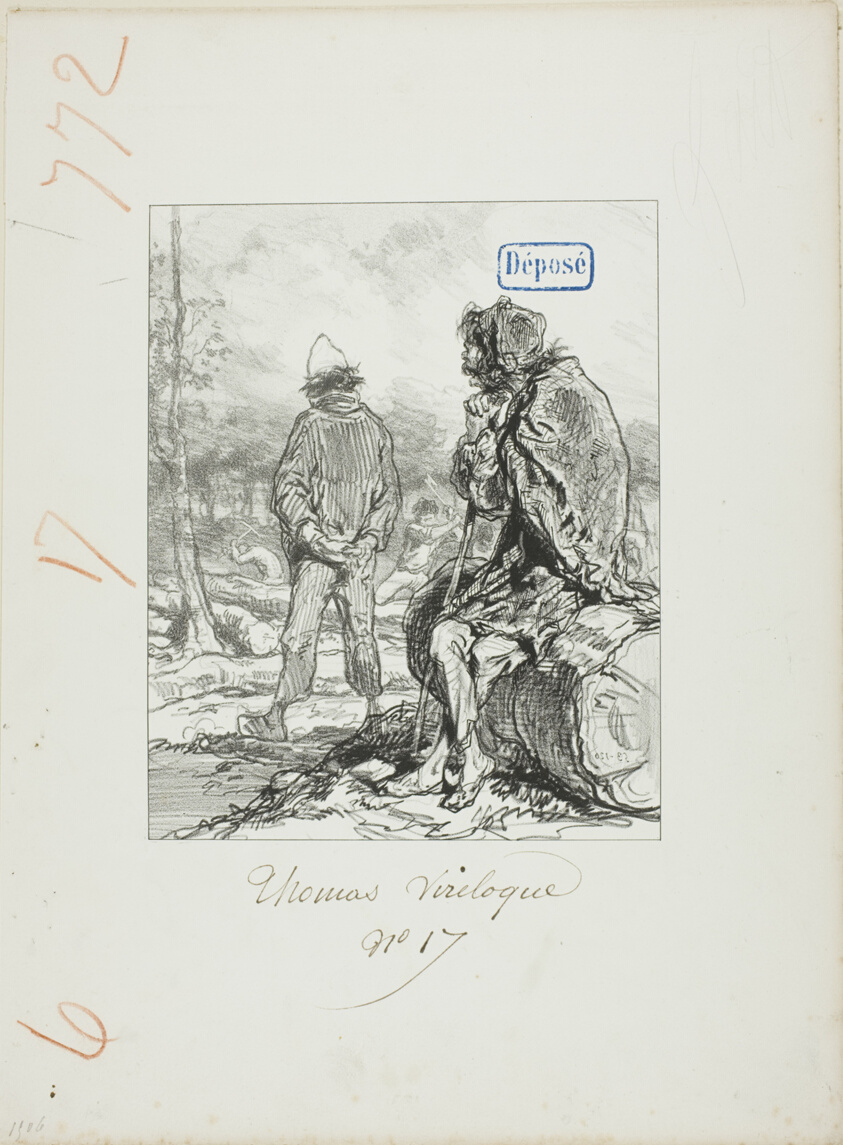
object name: Print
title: Les Propos de Thomas Vireloque: The new lord of the soil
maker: Paul Gavarni (French, 1804-1866)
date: 1853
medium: Lithograph in black on cream wove paper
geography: France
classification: lithograph; print; prints and drawing